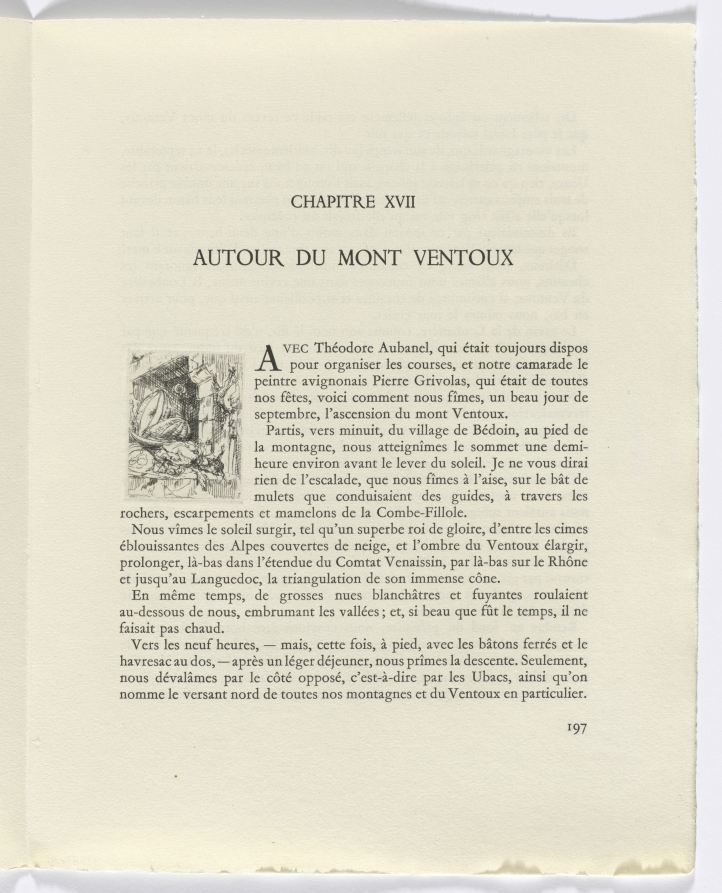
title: Frédéric Mistral: Mémoires et Recits by Frédéric Mistral: still life (page 197)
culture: France, 20th century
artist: Auguste Brouet (French, 1872–1941)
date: 1937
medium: etchings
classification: Portfolio